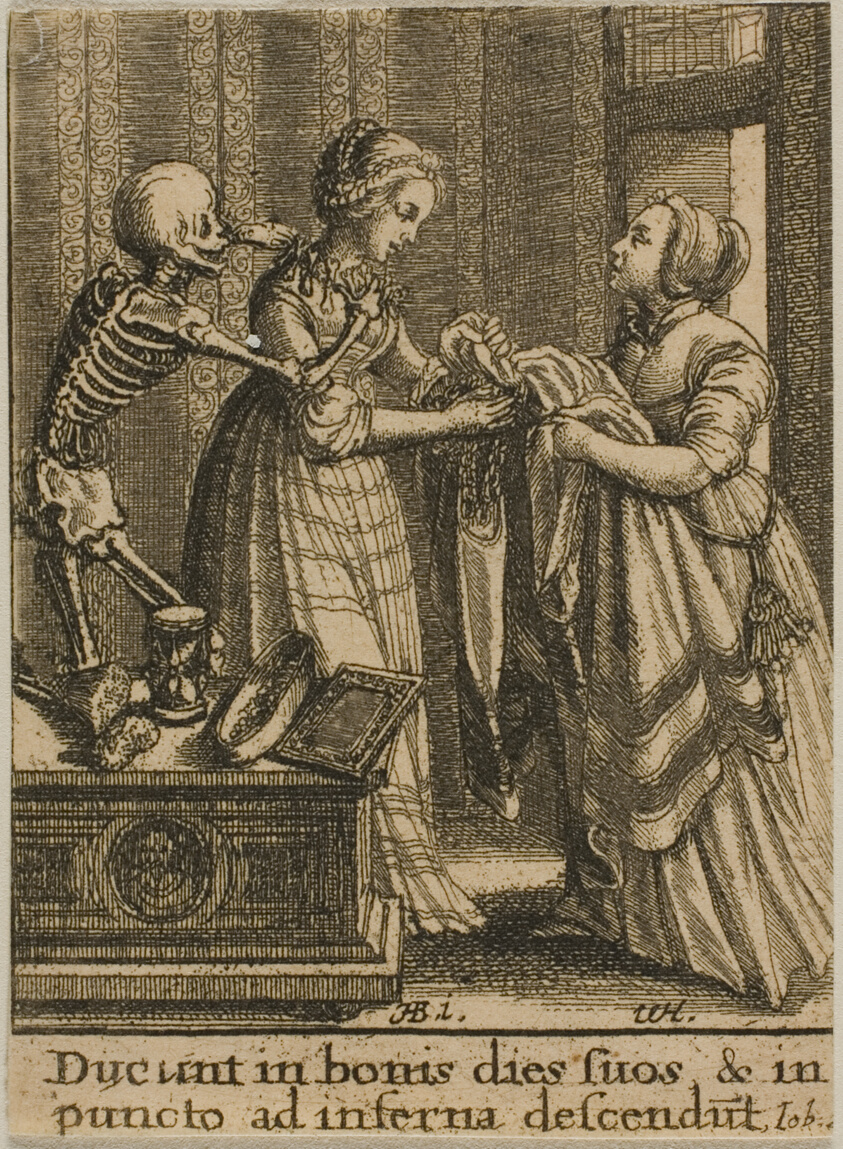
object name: Print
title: The Bride and Death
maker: Wenceslaus Hollar (Bohemian, 1607-1677); after Hans Holbein the younger (German, c.1497-1543)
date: 1651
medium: Etching on ivory wove paper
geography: Bohemia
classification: etching; print; prints and drawing